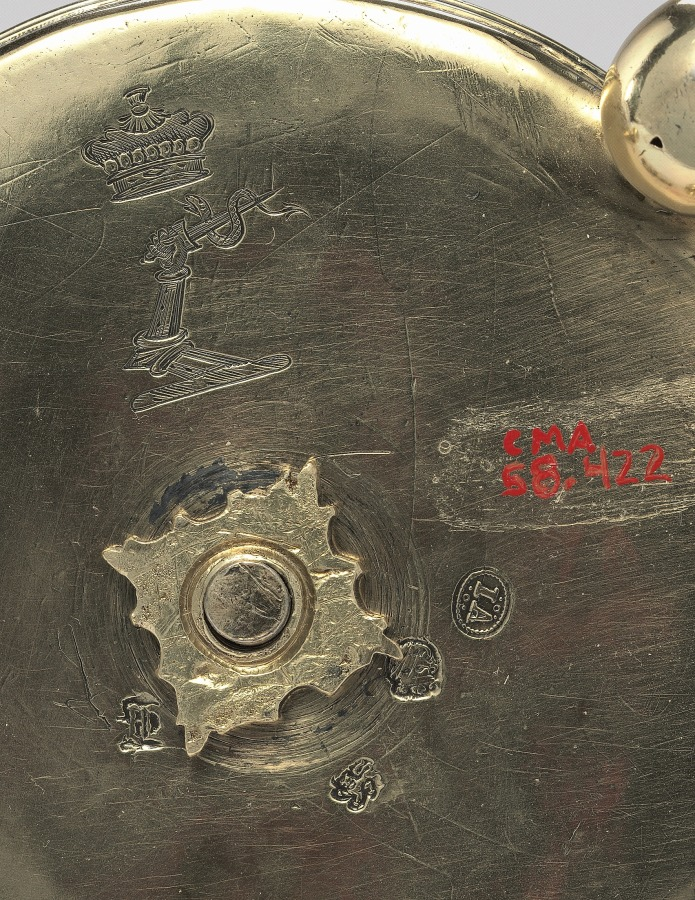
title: Two-Handled Cup and Cover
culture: England, London, 17th century (Charles II)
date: 1677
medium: silver and silver gilt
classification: Silver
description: Due to its size and ornament, this vessel may have functioned as a caudle cup, containing a mixture of ale or wine and bread, oatmeal, eggs, sugar, and spices that was given to women after childbirth to help them regain their strength. The scrolling foliage and exotic birds along the exterior of this cup were likely based on prints circulating in the 1600s. The reclining female figures capping the handles and the acanthus bud finial on the lid recall common architectural motifs.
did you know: Cups of this kind are often called sleeve cups since the ornament is incorporated into a pierced and chased hollow tube that slides over the gilded body of the cup.